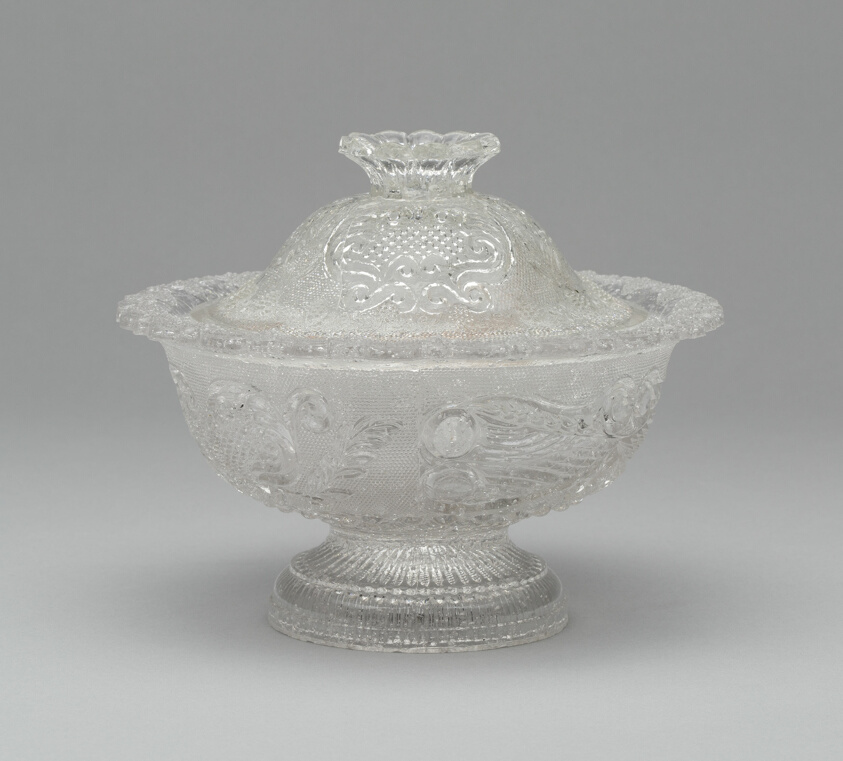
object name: Glass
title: Covered Sugar Bowl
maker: Attributed to Boston and Sandwich Glass Company; American, 1825–1888; Sandwich, Massachusetts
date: 1835–50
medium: Pressed glass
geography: Midwest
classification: sugar bowl; glass; american decorative arts; american arts; decorative arts